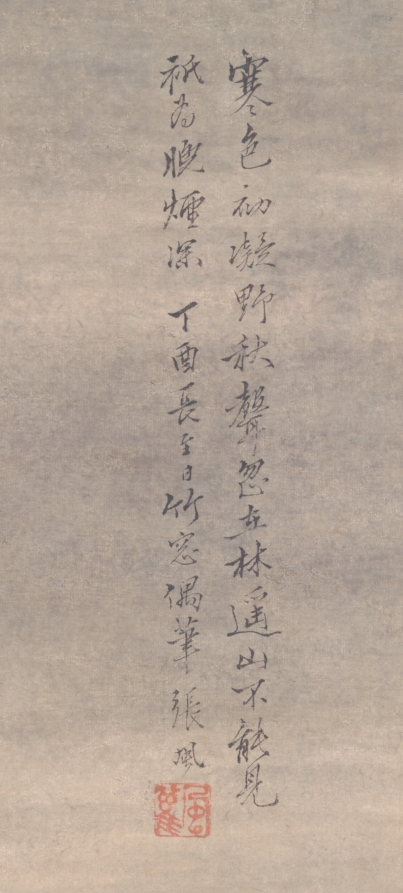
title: Listening to the Sound of Autumn in a Misty Grove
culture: China, Qing dynasty (1644-1911)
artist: Zhang Feng (Chinese, active c. 1632–1662)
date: 1657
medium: Hanging scroll; ink and color on paper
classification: Painting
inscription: Artist's inscription, signature, and 2 seals: Frosty colors have just appeared throughout the countryside,/ Autumn sounds echo unexpectedly through the trees./ The distant mountains cannot be seen,/ As the evening mist spreads, thicker and deeper./ Casually painted at the bamboo window on the solstice day of the dingyou year [1657]. Zhang Feng. [seal] Feng. [seal, lower left corner] Shangyuan Laoren. (Translation by LYSL/HK/WKH)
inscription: 3 additional seals: 1 of Fa Liang (Qing Dynasty); 2 unidentified.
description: Zhang Feng from Nanjing passed the local government examinations shortly before the fall of the Ming dynasty. With the Manchu conquest, he joined the ranks of loyalists who refused to serve the new regime. He chose the intermittently frugal life of a Buddhist adept. Many of his paintings lament the loss of the empire. In this scroll, he depicts a lone figure in a stark landscape of frosty atmosphere enshrouded in mists. Close looking reveals red strokes that color the grounds, a way of expressing his loyalty to the Ming whose family name Zhu means red.